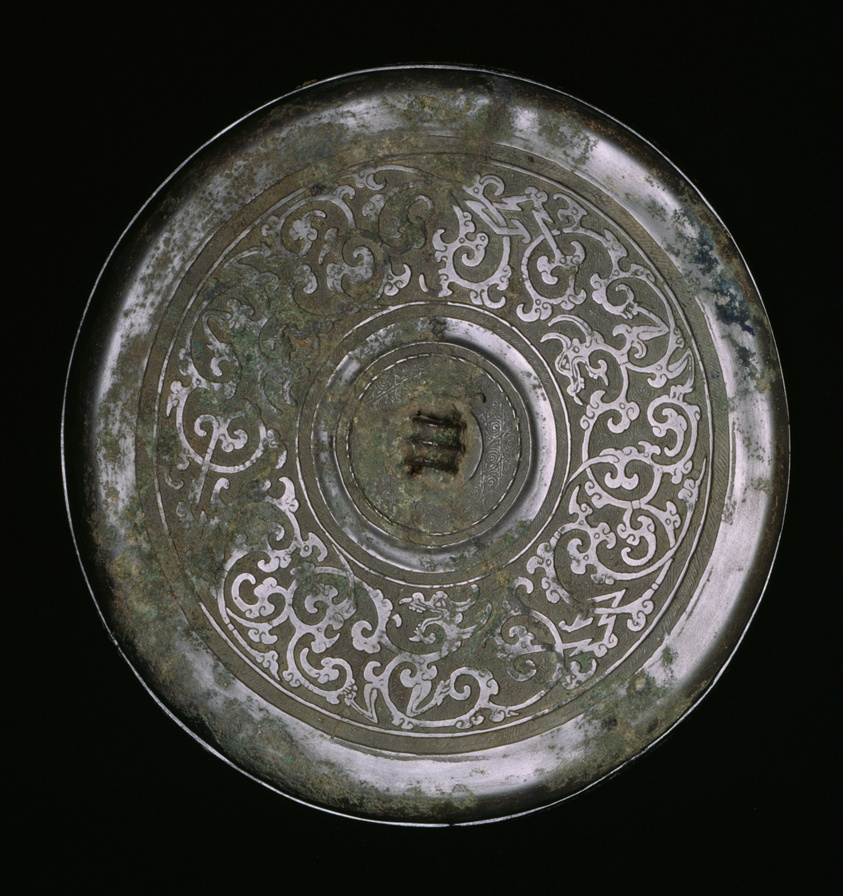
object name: Decorative Arts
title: Mirror with Dragon Arabesques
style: Chinese (culture or style)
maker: China; probably from Hunan province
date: Eastern Zhou dynasty, Warring States period or early Western Han dynasty, 3rd/2nd century B.C.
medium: Bronze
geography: China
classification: bronze; metal; mirror; asian art; decorative arts